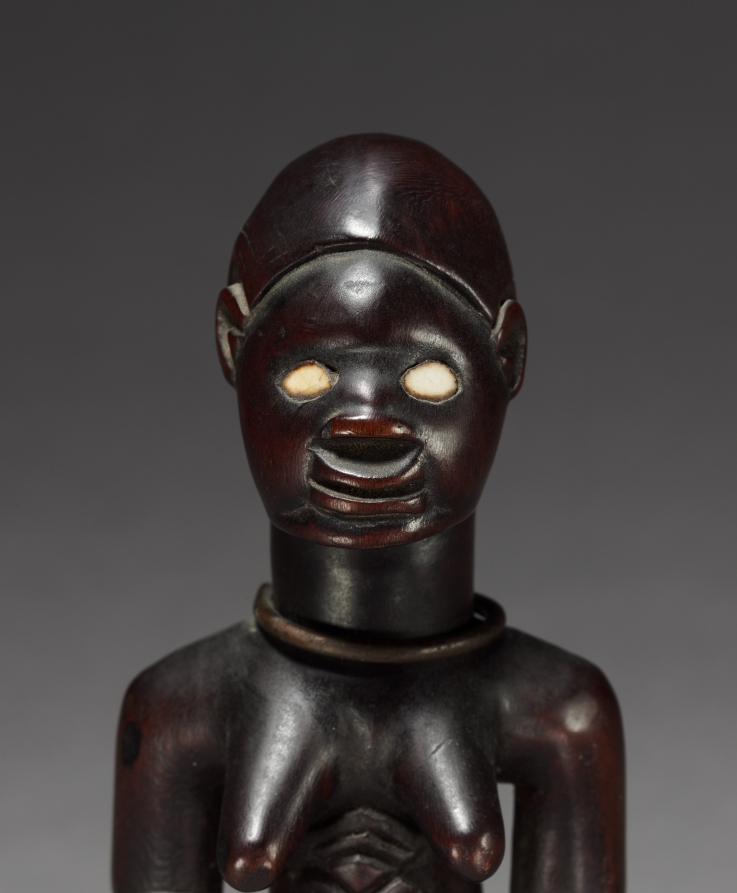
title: Female Figurine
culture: Africa, Central Africa, Republic of the Congo, Beembe-style maker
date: late 1800s-early 1900s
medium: Wood, possibly ceramic, and copper alloy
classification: Sculpture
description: Beembe figurines generally have greatly detailed anatomical and decorative features. The scarification among Beembe men and women communicated their ideas about local beauty and ethnic belonging. These figures are charged with an ancestor’s spirit through a mixture of resin and human-derived ingredients—taken from the corpse of the person they possibly portray—into a small cavity near the rectum.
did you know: The carvings in the figure’s abdomen reflect the custom of body scarification among the Beembe people.